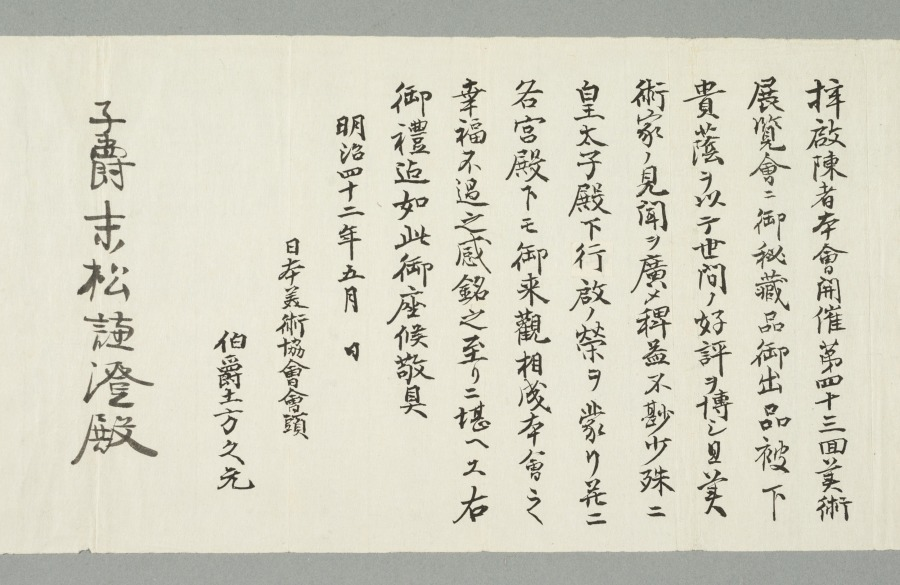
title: Fujiwara no Muchimaro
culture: Japan, Kamakura period (1185–1333)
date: 1200s or 1300s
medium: Hanging scroll; ink, color, gold, and cut gold on silk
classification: Painting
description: This portrait of Fujiwara no Muchimaro (680–737), a grandson of Fujiwara no Kamatari (614–669), includes an image of Buddha Dainichi Nyorai above his head. By situating the image of Dainichi there, this painting would seem to assert that Muchimaro is an avatar of Dainichi. In the same way that kami could be identified with Buddhist counterparts, powerful humans could also be seen as manifestations of Buddhist deities. A similar painting is at Eizanji in Nara, of which Muchimaro is known as the founder. It was once a branch temple of Kōfukuji, the Fujiwara family temple.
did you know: The boughs of wisteria appearing in the background symbolize the figure's status as a Fujiwara family member.